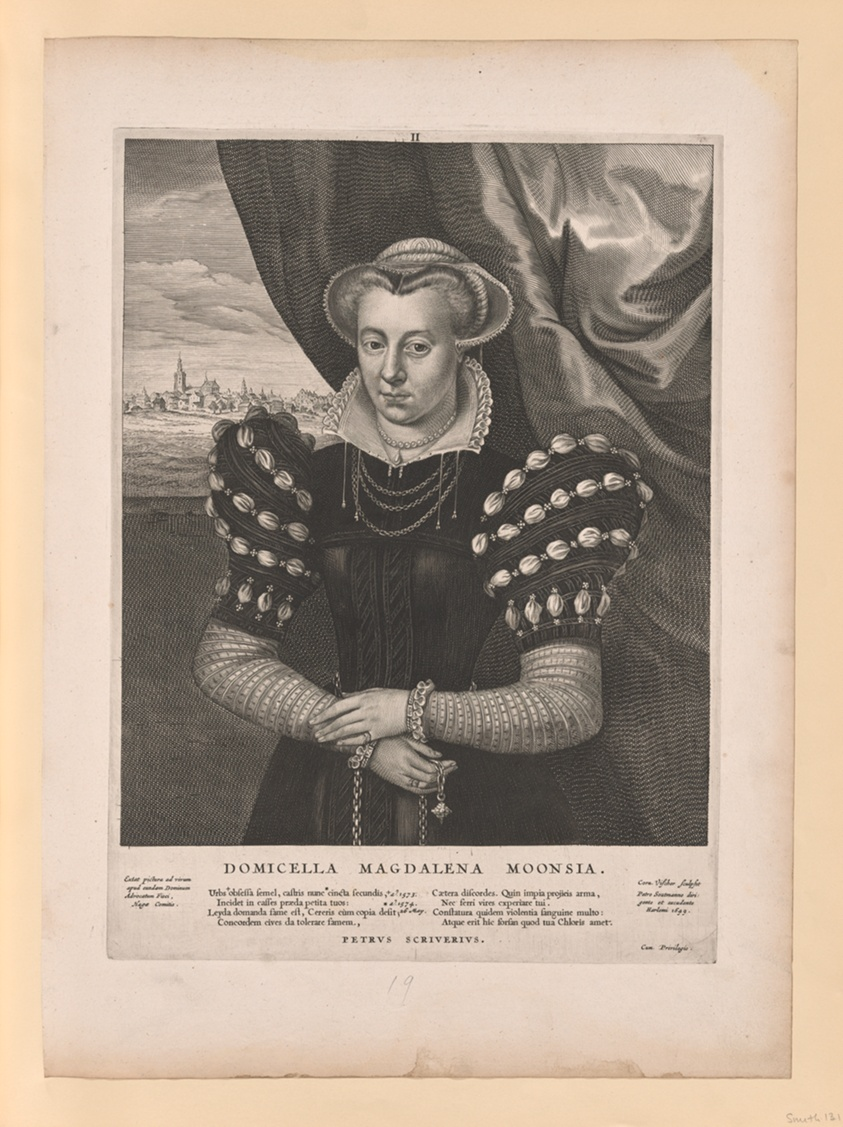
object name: Print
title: Magdalena Moons, from Quatuor Personae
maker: Cornelis Visscher (Dutch, c. 1629-1658); published by Pieter Claesz. Soutman (Dutch, c. 1580–1657)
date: 1649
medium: Engraving on paper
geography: Netherlands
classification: engraving; paper; print; prints and drawing